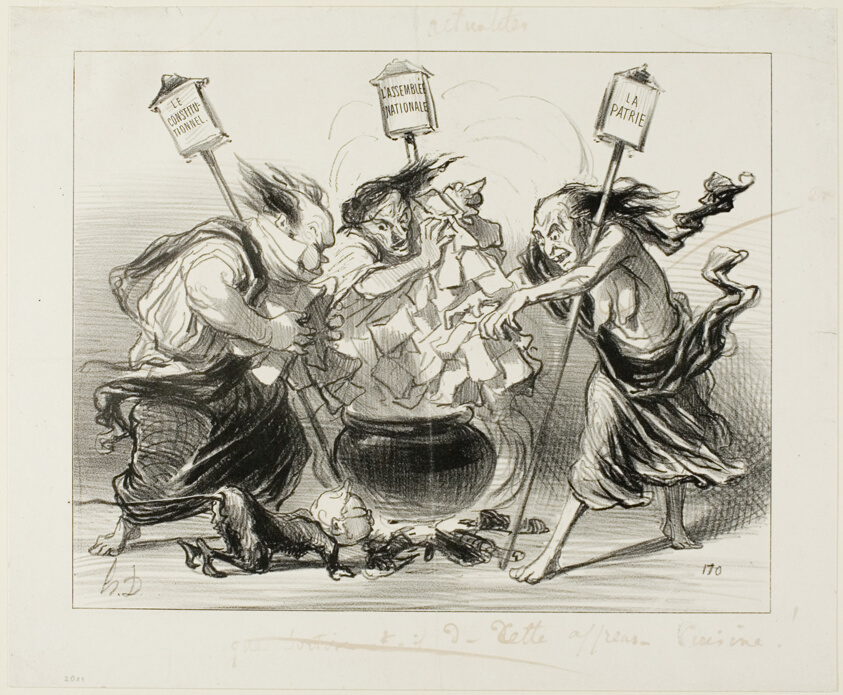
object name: Print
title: Too Many Cooks Spoil the Broth, plate 129 from Actualités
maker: Honoré Victorin Daumier; French, 1808-1879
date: 1850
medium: Lithograph in black on white wove paper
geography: France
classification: lithograph; print; prints and drawing